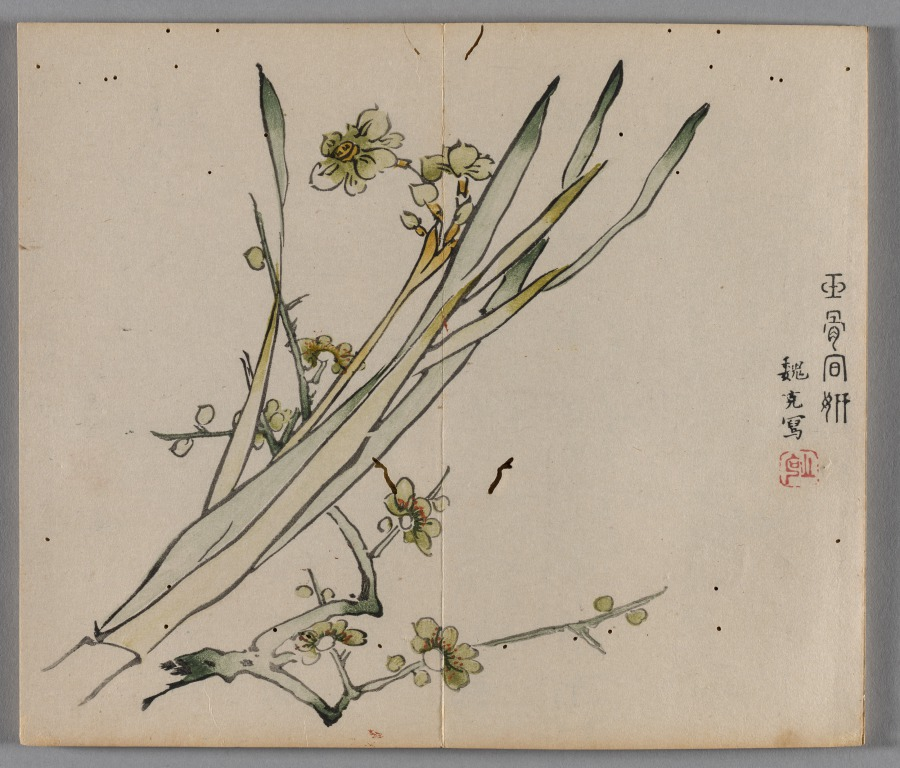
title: Ten Bamboo Studio Painting and Calligraphy Handbook (Shizhuzhai shuhua pu): Plum Blossoms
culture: China, Qing dynasty (1644-1911)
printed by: Hu Zhengyan (Chinese, c. 1584–1674)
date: 1633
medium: Woodblock-printed book; ink and colors on paper; first edition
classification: Print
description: Color printing reached a level of perfection in the early 1600s, as seen in this Ten Bamboo Studio Collection of Calligraphy and Painting and the Mustard Seed Garden Manual of Painting (printed 1679 and 1701). The painterly quality, precision in registering (aligning) the woodblocks, and harmonious colors made them the most successful color print editions in Chinese history. Both editions were printed and compiled in Nanjing, spread nationwide, and had a great impact on the arts in Japan and Korea.